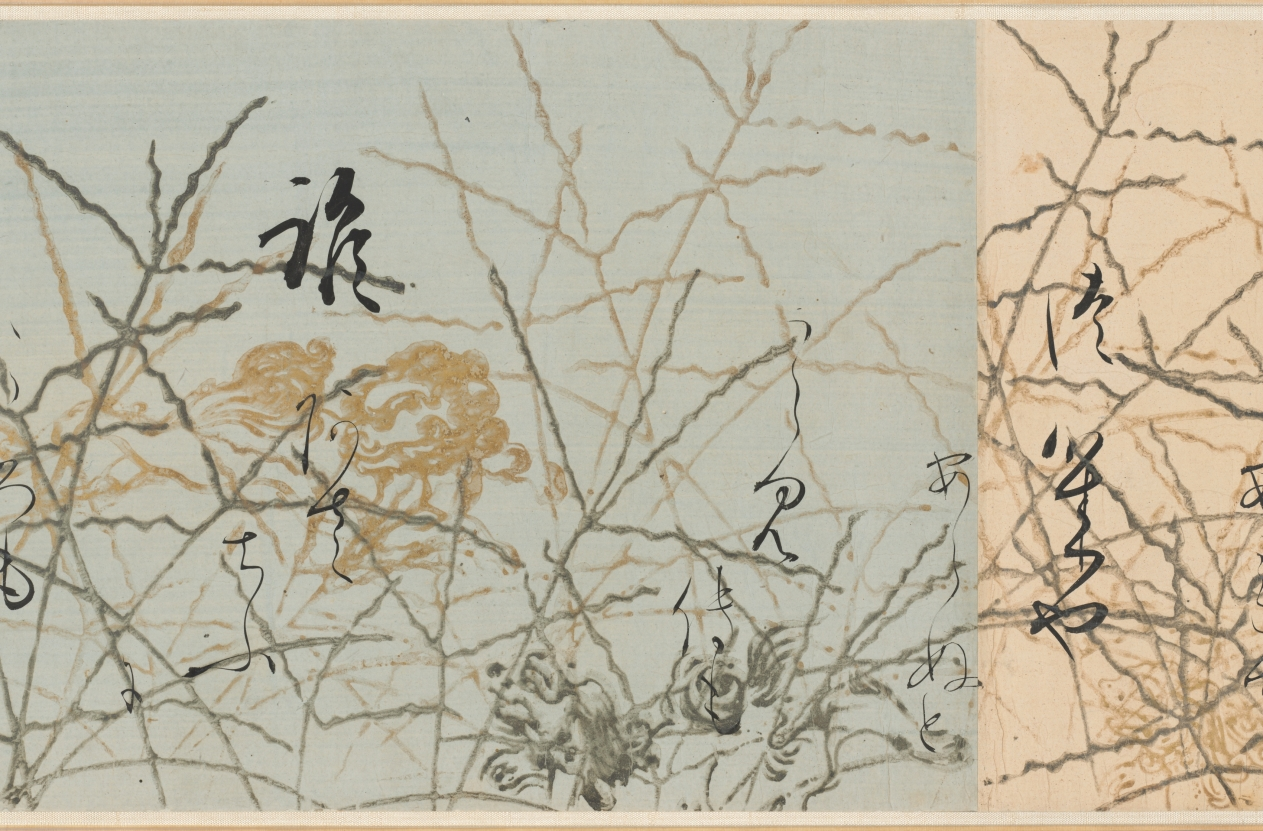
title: Selections from the New Collection of Japanese Poems from Ancient and Modern Times (Shinkokin wakashū) with Printed Designs of Chinese Lions and Crab Finger Grass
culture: Japan, Edo period (1615–1868)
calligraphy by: Hon'ami Kōetsu (Japanese, 1558–1637)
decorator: Tawaraya Sōtatsu (Japanese, c. 1570–c. 1640)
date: early 1600s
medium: handscroll; ink, gold, and silver on paper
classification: Calligraphy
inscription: Seal: 光悦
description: Hon’ami Kōetsu was a calligrapher and craftsman who frequently collaborated with the painter Tawaraya Sōtatsu, considered the first master of the Rinpa school. Kōetsu brushed seven poems from the autumn section of a poetry anthology onto dyed paper with motifs designed and printed in gold and silver by Sōtatsu.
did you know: Before becoming a master painter of screens, Tawaraya Sōtatsu painted fans.